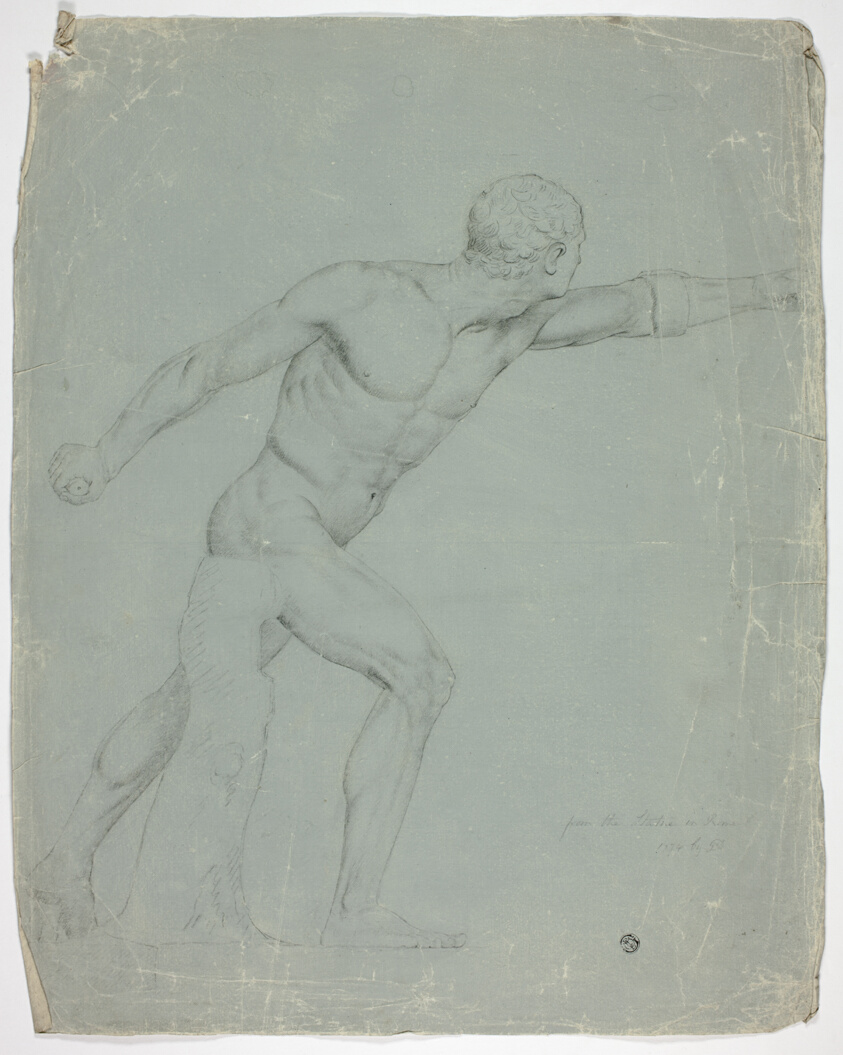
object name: Drawing and Watercolor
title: The Borghese Gladiator from the Statue in Rome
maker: John Downman (English, 1750-1824)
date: 1774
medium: Charcoal with stumping on ivory laid paper prepared with a pale blue ground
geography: England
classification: charcoal; drawings (visual works); prints and drawing